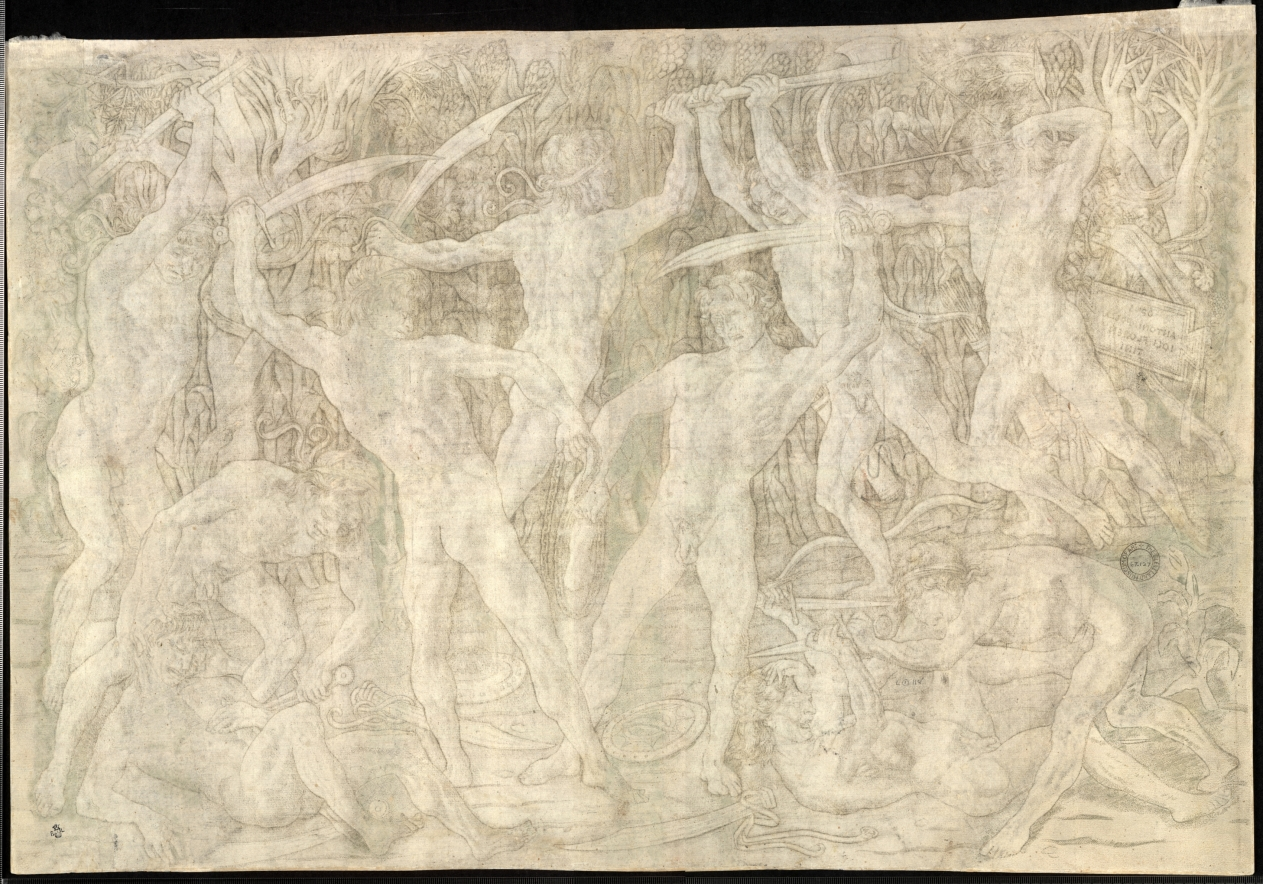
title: Battle of the Nudes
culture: Italy, 15th century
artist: Antonio del Pollaiuolo (Italian, 1431/32–1498)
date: 1470s–80s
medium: engraving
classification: Print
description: This engraving is one of the earliest Renaissance prints to portray the nude male body in action. Antonio del Pollaiuolo’s grimacing warriors appear like clones in different poses. The print may have functioned as a model for workshop apprentices studying human anatomy while learning to draw; however, the artist’s Latin signature suggests it also had an audience educated in literature. Art historians remain uncertain whether Pollaiuolo intended to depict a particular story or historical event. It is possible he created a deliberately ambiguous allegory that would appeal to patrons interested in interpreting symbols. For example, the continuous chain shared by the two central men could refer to an ancient idea that the body is the chain of the soul, only to be released in death.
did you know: Considered a groundbreaking work in the history of the Italian Renaissance, the CMA holds the only known impression of the print's first state.